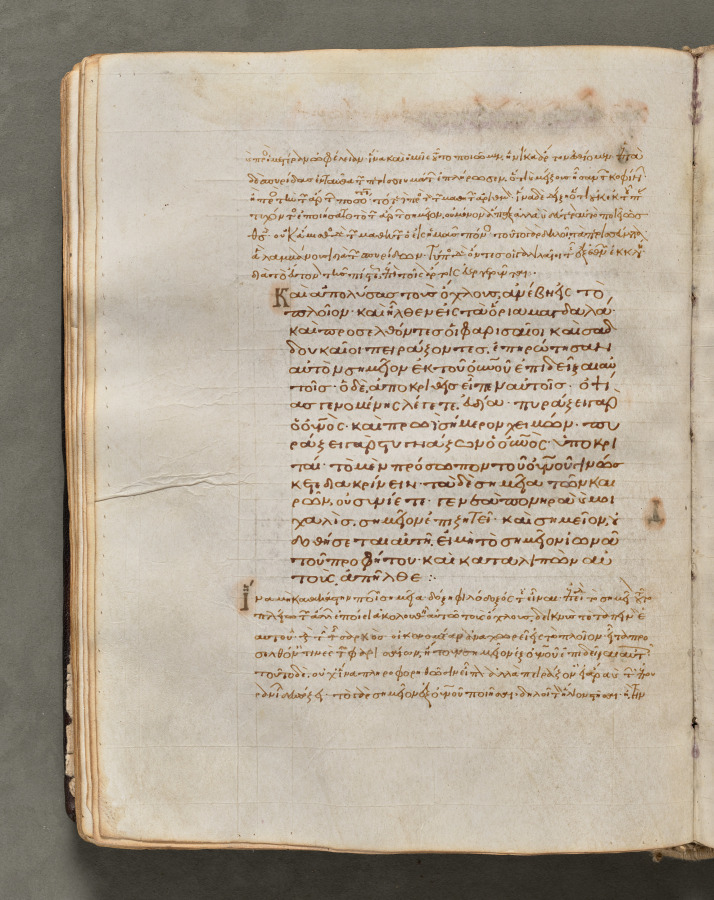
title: Text, folio 71 (verso), from a Gospel Book with Commentaries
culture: Byzantium, Constantinople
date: c. 1000–1100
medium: ink, tempera, and gold on vellum; leather binding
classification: Bound Volume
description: Each of the four gospels in this book opens on a page with brilliantly illuminated borders depicting the author of the text as well as birds-principally peacocks, symbols of the immortality of the soul-and fountains, representing the fountain of life and the salvation of the soul. This volume consists of 428 leaves with texts in Greek. Its level of sophistication suggests that it was probably written and decorated in a monastery in Constantinople.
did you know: Gospel Books were carried in procession through Byzantine churches.